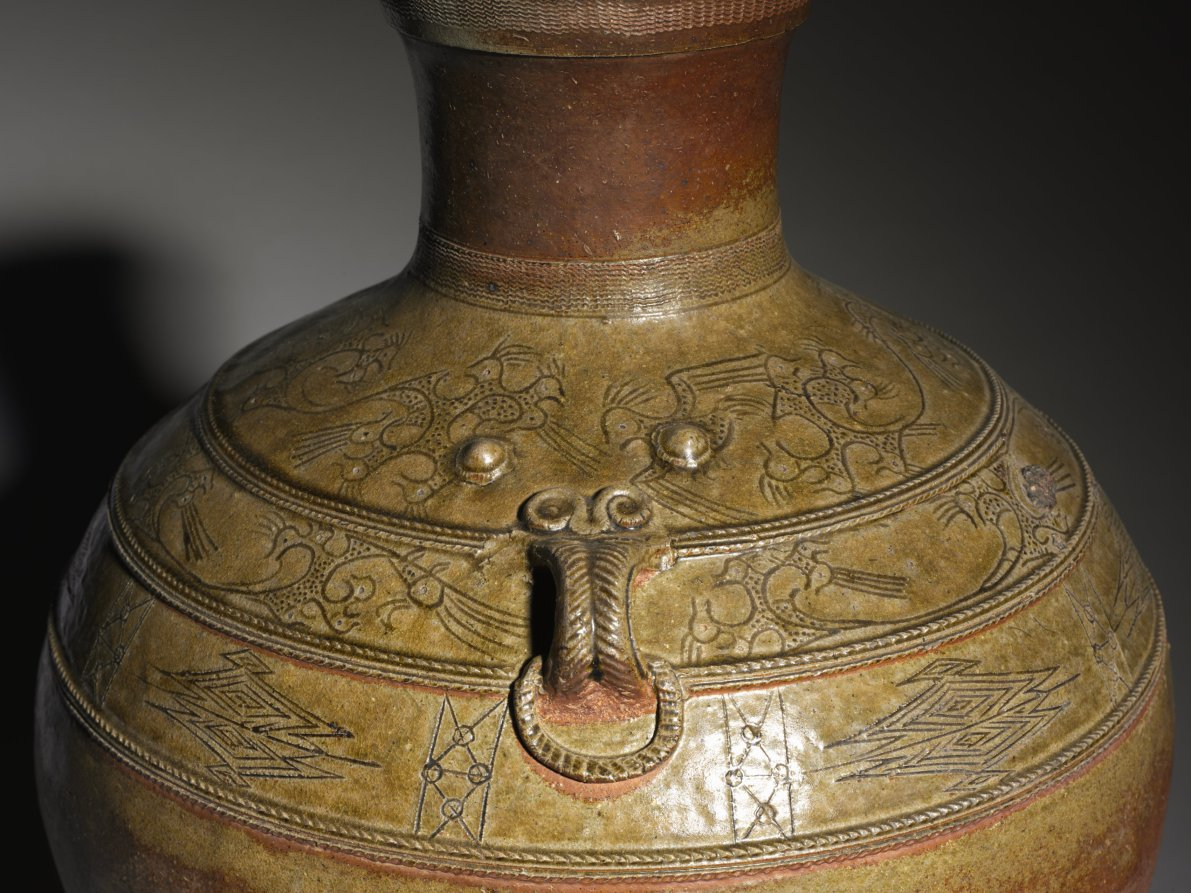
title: Jar (Hu)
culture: China, probably Zhejiang province, Han dynasty (202 BCE–220 CE)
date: 100 BCE–100 CE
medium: glazed stoneware with incised and applied decoration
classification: Ceramic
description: This superb Han dynasty jar has a robust shape imitating that of the bronze (hu) and is covered with a thin brownish-green glaze. The introduction of glazing—which provided an impervious coating to a clay body—marked a technological breakthrough in Chinese ceramic history. High-fired glazed pots were made as early as the Shang and Zhou dynasties (about 1600–256 BC). Potters gained practical technical knowledge of the reaction between the metallic oxide in the glaze and the kiln atmosphere to modify the color of a glaze.